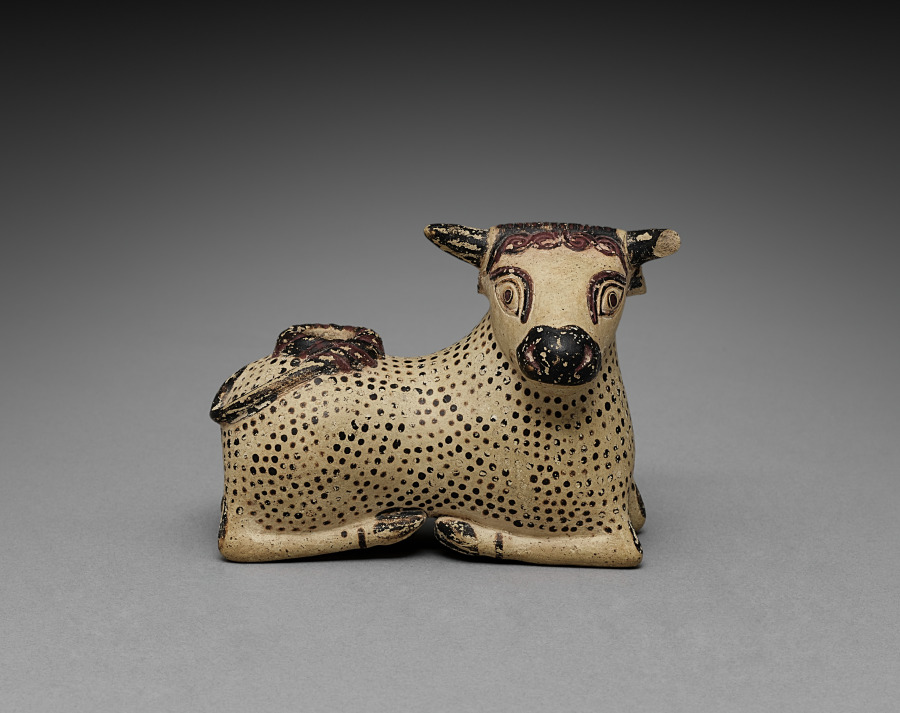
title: Oil Flask in the Shape of a Bull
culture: Greek, Corinthian or modern forgery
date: 600–575 BCE or 1900s CE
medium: ceramic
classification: Ceramic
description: This small bull-shaped flask is similar in form and painted decoration to a class of figure-shaped perfume vessels created during the late seventh and early sixth centuries BC in Greece and Italy (especially Corinth, Rhodes, and Etruria). The stippled body decoration characterizes such vases from multiple sites, while the light-colored clay and inconspicuous orifice placement are typical of Corinth. But no other reclining bulls are known among such vases (and only a few bullheads or upper bodies), raising questions about authenticity. A 1986 analysis determined that this object had been recently fired, and a 2020 clay analysis placed its origin in the Catalonia region of Spain, far from any known ancient production area for such flasks.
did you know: The curled tail masks a filling hole atop the back.